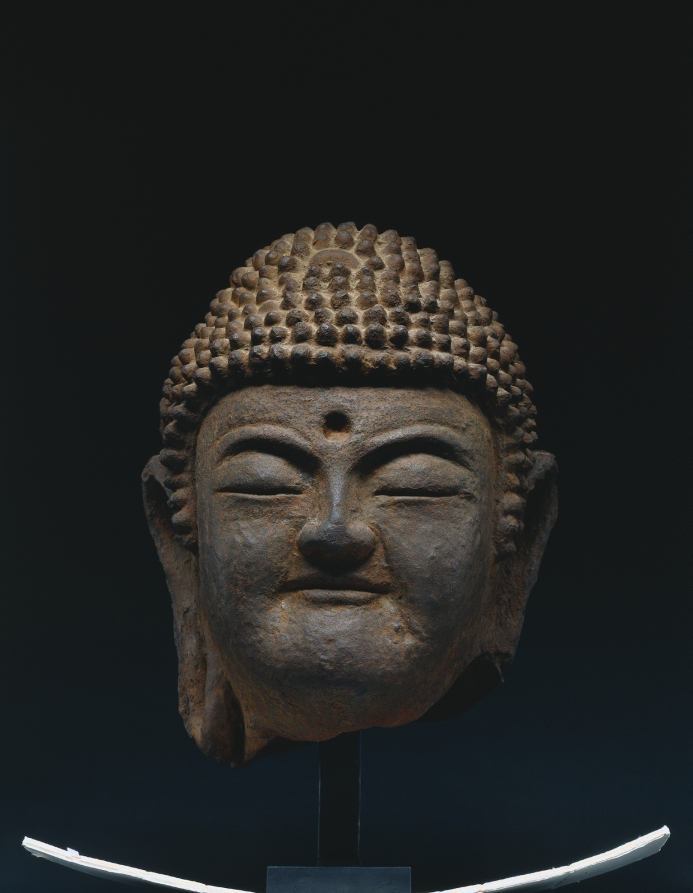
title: Buddha Head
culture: Korea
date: 1900s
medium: cast iron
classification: Sculpture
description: This Buddha has a soft and gentle smile, a typical attribute of Korean images of the Buddha. His plum cheeks and soft smile remind us of his childlike purity while his nearly closed eyes show him in a moment of meditation. The empty divot in the middle of the forehead would originally have contained a jewel symbolizing the light emanating from the Buddha. His head is topped with a profusion of snail-shell curls and an ushnisha, a mound symbolizing the Buddha’s enlightenment.